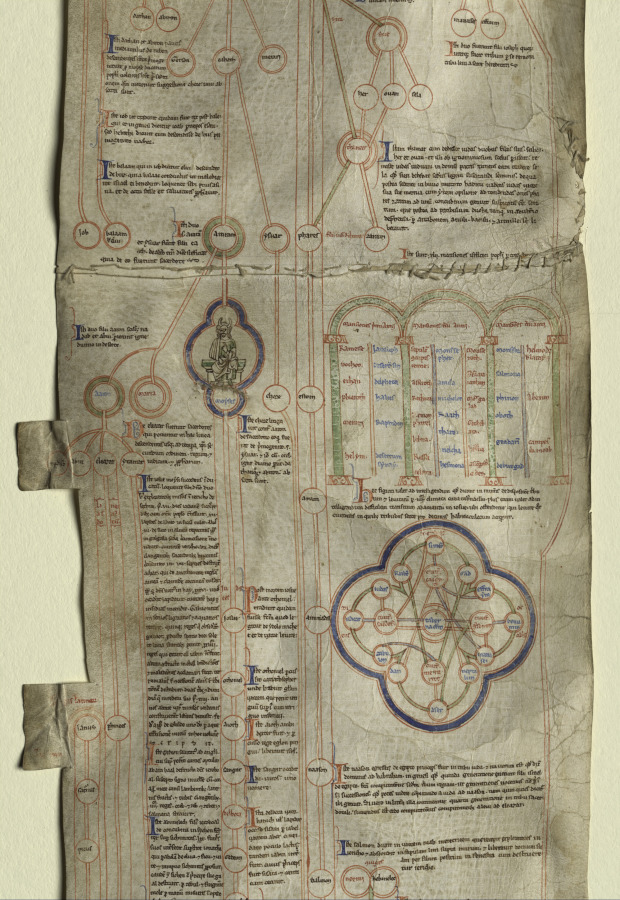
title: Peter of Poitiers's "Compendium Historiae in Genealogia Christi"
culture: England, Canterbury, 13th century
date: c. 1220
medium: ink and tempera on a vellum roll of four membranes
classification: Manuscript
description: This manuscript roll, composed of four membranes formerly stitched together in a continuous roll about nine feet long, has been divided in the middle for easier visibility and study. The text is an abridgment of biblical history focused on the descent of Christ from Adam. It was written by Peter of Poitiers (about 1130–1205), who taught theology and history in Paris and was widely copied. The present roll is an English copy of Peter's text made shortly after his death. Although manuscript rolls were hung on the walls of a classroom as instructional aids to students, some of them have value beyond their textual and historical interest because of the fine quality of their drawings, as seen here. A comparison with Canterbury manuscripts and stained glass of around 1220 is the basis for the attribution to Canterbury. Peter of Poitiers's aim in this project was to assist students prevented from mastering biblical history because of its length and because they were too poor to own books. His text on roll is the briefest possible summary of biblical history. It is arranged in six historical stages, denoting the six ages of the world, as decreed by theological tradition. The first five ages were inaugurated by Old Testament individuals: Adam, Noah, Abraham, David, and Sedecias. The birth of Christ heralded the sixth stage. Beginning at the top of the first membrane, the text consists of brief biographical entries on the ancestors of Christ (Adam, Noah, Abraham, Moses, and David) and other biblical personalities. These extend to the birth of Christ on the fourth membrane, ending with accounts of Hebrew and Roman kings and the Apostles. Each compendium shows the names of the ancestors inscribed within circles, those of direct descent placed vertically in a central column, others scattered in clusters to the right and left. The decoration of the roll consists of a series of medallions of diverse geometrical frames filled with either a figural drawing or a diagram. The style of these pen-and-ink drawings, some illuminated in tempera or tinted with wash, stems from English manuscript and glass painting attributed to the school of Canterbury Cathedral. The style of the museum's illustrations is so close to the stained glass panels made for Trinity Chapel at Canterbury (about 1220) to suggest that an artist active as a glazier in the Cathedral workshop may also have executed the manuscript. In the least, the painter of the roll manuscript was familiar with the style of the painted glass, and on this basis, a date of about 1220 seems appropriate. Additional evidence is supplied by a psalter illuminated at Canterbury shortly before 1220. The figurative scenes in this psalter were apparently illustrated by the same hand that executed the line and wash drawings in the museum's roll.